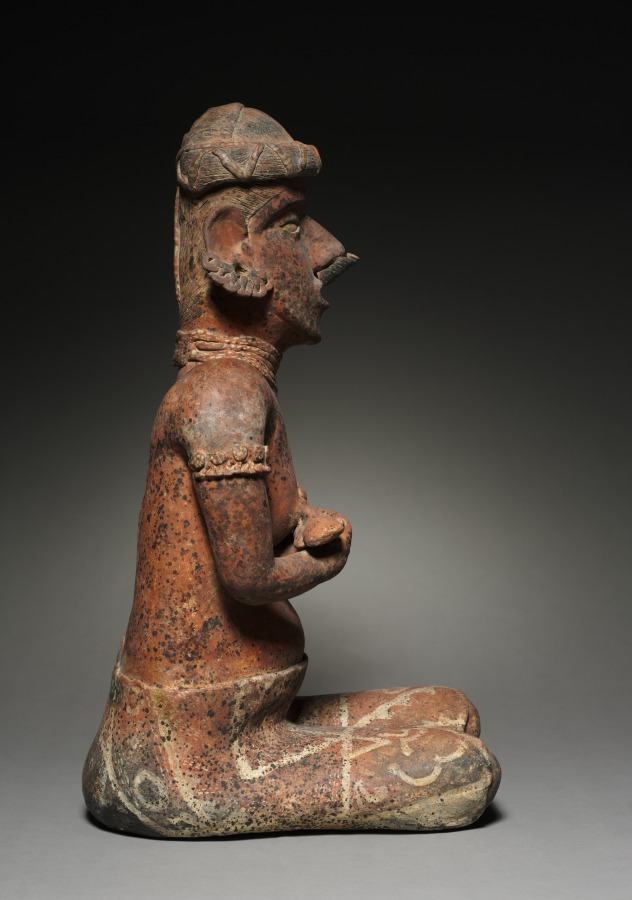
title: Female Seated Figure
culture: Mexico, Nayarit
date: 100 BCE–300 CE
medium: ceramic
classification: Ceramic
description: This couple-extremely fine examples of their kind-may commemorate the marriage of an important person, such as a chief, but could also represent siblings of a chiefly family. Whatever their relationship, their unity is conveyed by their physical similarities, including their jewelry, which marks high social station. The female is unusual in nursing an infant, likely a reference to generational renewal and the continuation of noble bloodlines. The significance of the male’s activity-beating a turtle-shell drum- is not understood.